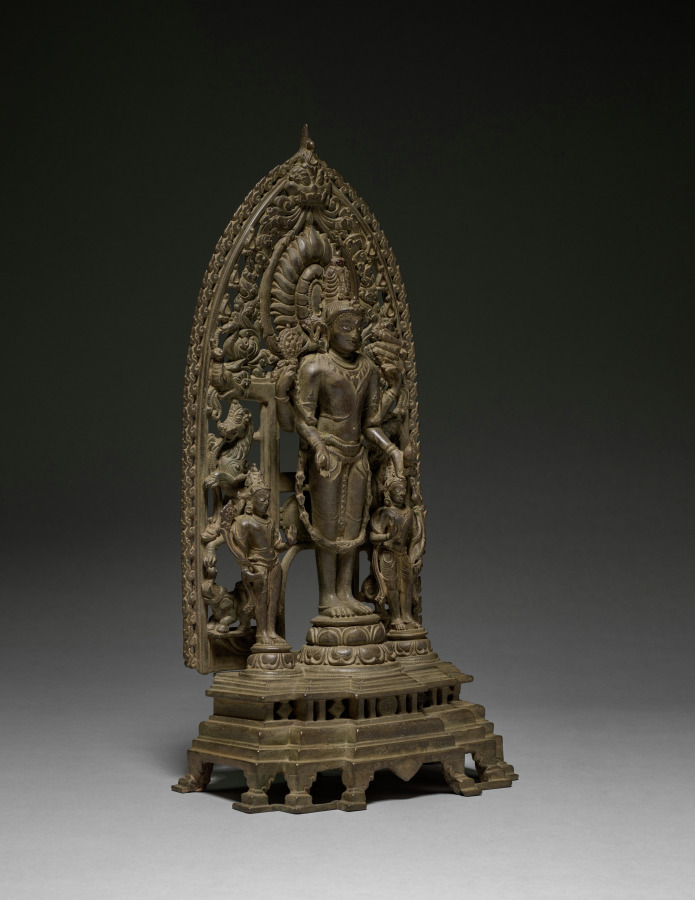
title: Vishnu Attended by Chakrapurusa and Shankhapurusa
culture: East India, Bengal, Pala period, 11th-12th century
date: 1000s–1100s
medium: bronze with silver inlay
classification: Sculpture